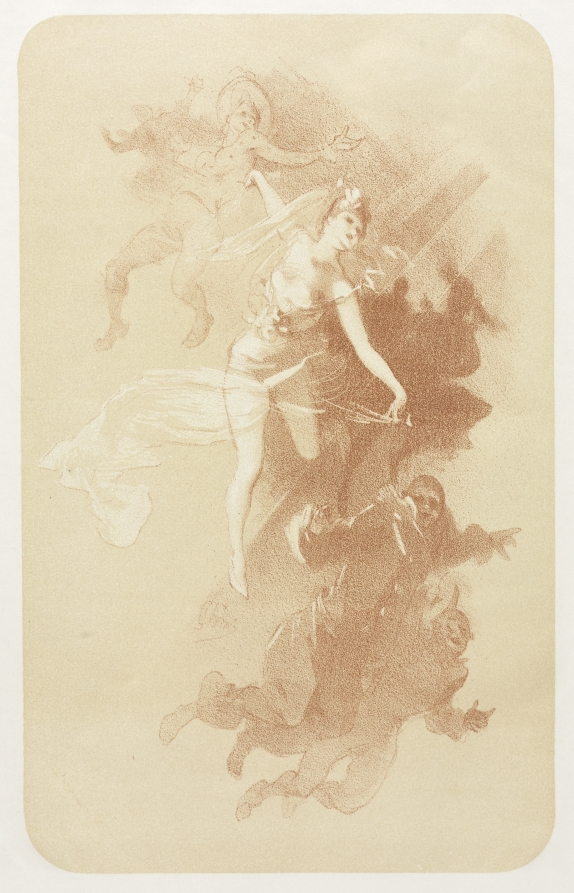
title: The Dance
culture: France, 19th century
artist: Jules Chéret (French, 1836–1932)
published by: L'Estampe Originale, Album IV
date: 1893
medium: lithograph printed in colors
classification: Print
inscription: signed, lower right, in graphite: Jules Chéret; signed, left center, on stone: "J. Chéret"